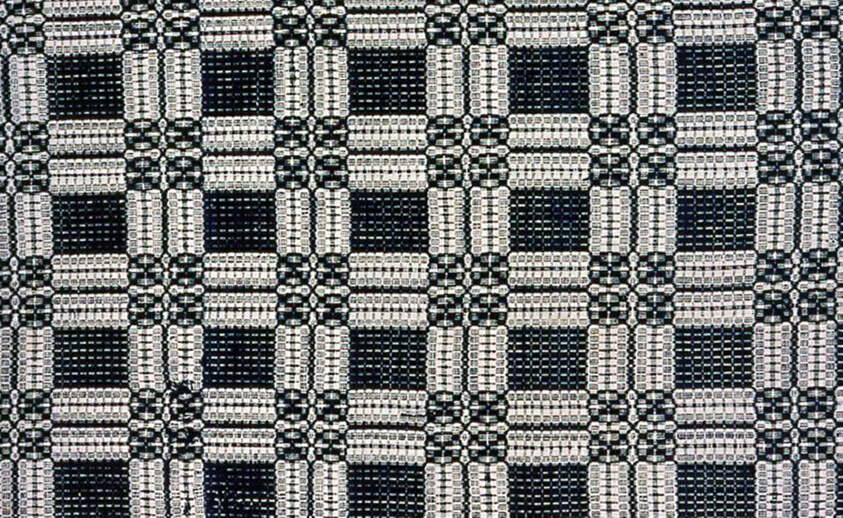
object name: Textile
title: Coverlet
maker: United States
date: 1820/30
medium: Cotton and wool, plain weave with supplementary patterning wefts (overshot); two loom widths joined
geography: United States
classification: textile; weaving - coverlet; weaving; coverlet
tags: coverlet